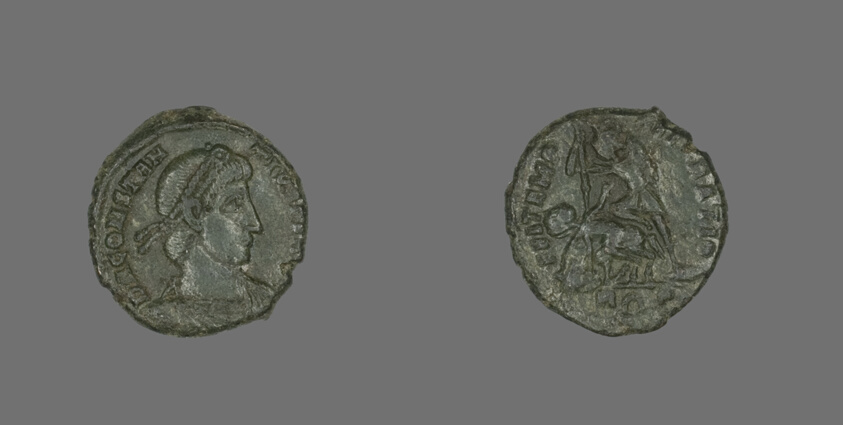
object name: Coin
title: Coin Portaying Emperor Constantius II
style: roman (ancient, style or period), ancient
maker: Roman, minted in Aquileia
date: 337-361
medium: Bronze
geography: Roman Empire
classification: coin; ancient art